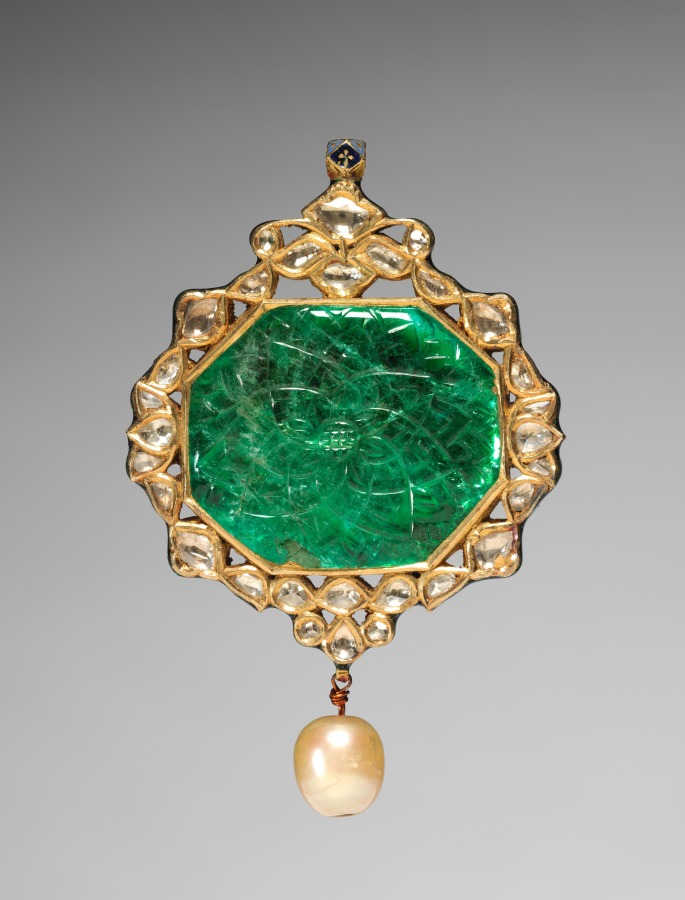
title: Pendant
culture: Northwestern India, Rajasthan, Rajput Kingdom of Jaipur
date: 1700s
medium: Gold, emerald, diamonds, enamel, and pearl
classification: Jewelry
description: The large green emerald on one side of this pendant was probably imported to India from Columbia. Delicately incised with a lotus blossom, a symbol of the sun, it is surrounded by inset diamonds in organic, petal-like shapes. Emeralds, especially prized for their green color, were associated with the planet Mercury in Hindu astrology and with the power to ward off evil in Islam. On the reverse, a peacock and two peahens surrounded by flowers are rendered using blue, green, and red glass.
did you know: The bright color of the emerald indicates it was sourced in South America.